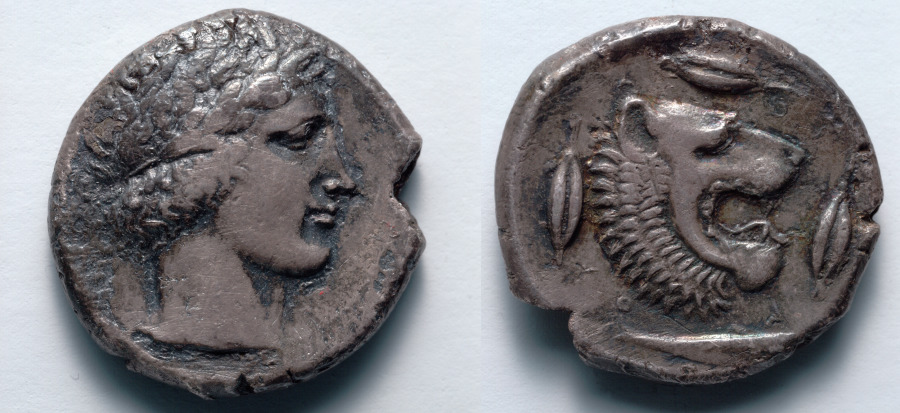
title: Tetradrachm: Head of Apollo (obverse); Head of Lion (reverse)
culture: Greek, minted at Leontinoi (Sicily)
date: 466–422 BCE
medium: silver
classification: Coins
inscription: [ΛΕ]Ο[ΝΤ]ΙΝΟΝ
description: The lion, king of the beasts and an animal associated with regal and heroic power, featured prominently on the coinage of many ancient Greek city-states. Artists placed the lion in a variety of poses, sometimes including the whole body, at other times the foreparts or just the head. Although it may once have roamed nearby, for many Greeks the lion was a monster nearly as exotic as the Chimaera, of which it formed a part, together with a goat head and snake-headed tail.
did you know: The lion on coins of Leontini marks a pun on the city name.